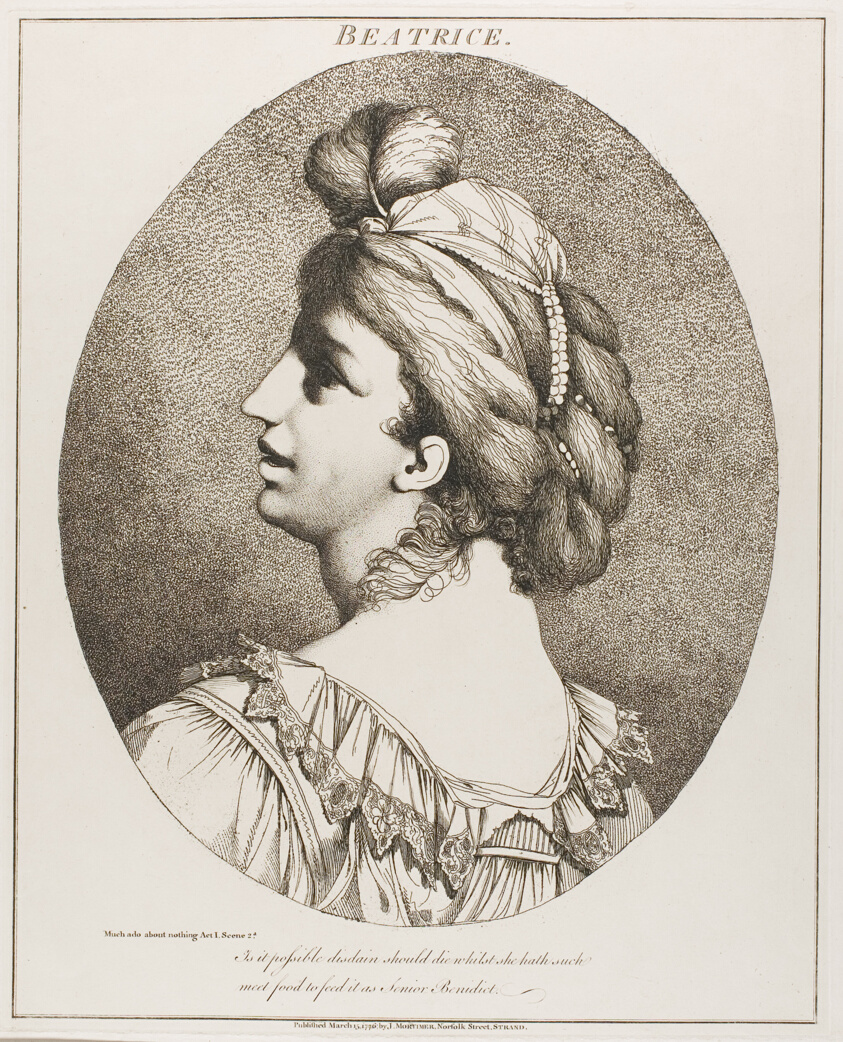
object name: Print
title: Beatrice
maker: John Hamilton Mortimer (English, 1740-1779)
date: March 15, 1776 (originally published); published 1809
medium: Etching on cream wove paper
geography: England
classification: etching; print; prints and drawing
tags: Much Ado About Nothing, literature, prints and drawings